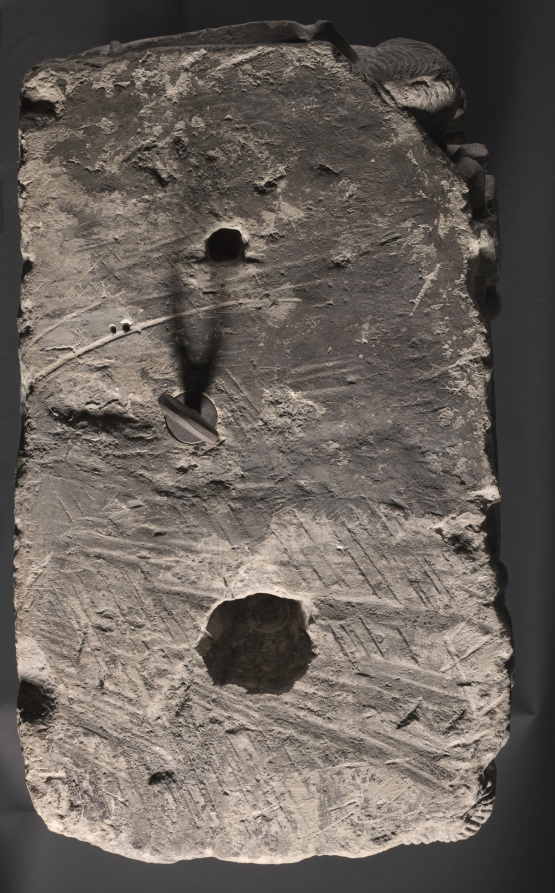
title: Daniel in the Lion's Den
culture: France, Saint-Aignan-sur-Cher, 12th century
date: c. 1125–50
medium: limestone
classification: Sculpture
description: According to the Old Testament, Daniel was cast into a lion’s den as punishment for his belief in a single god, but he was miraculously delivered from harm on account of his faith. This story is related here, with Daniel flanked by lions and the angel sent by God to save him. Together with other decorated capitals, this imposing work of Romanesque sculpture once decorated the interior of the church of Saint-Aignan-sur-Cher, a city in central France.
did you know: During the 12th century, churches used images to teach the faithful who were illiterate. While Daniel lived before Jesus, he is depicted holding a bible, alluding to the continuity between the Old and New Testaments.